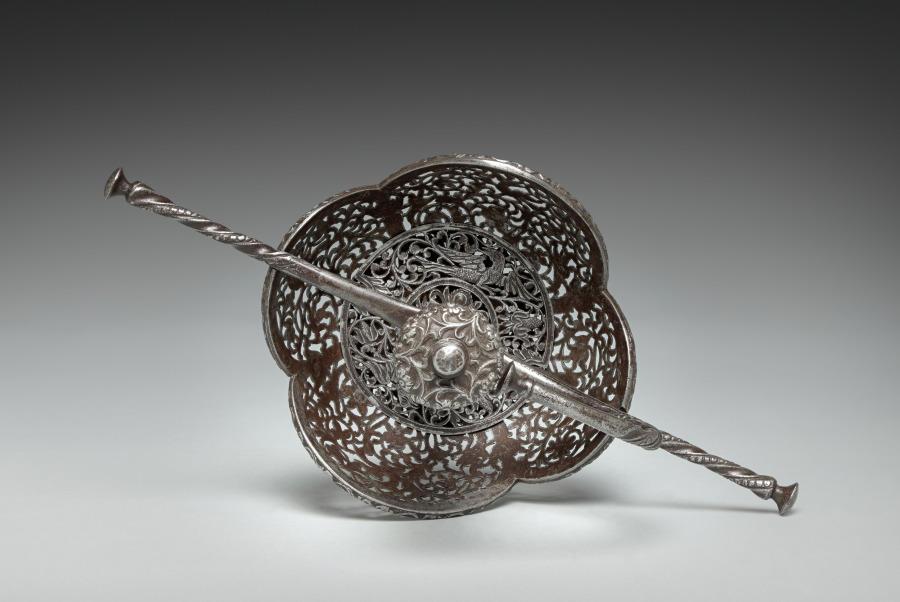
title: Cup-Hilted Rapier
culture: Spain, Toledo, 17th century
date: c. 1650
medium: Pierced and chiseled steel;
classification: Arms and Armor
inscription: PEDRO DEL MONTE/ IN TOLEDO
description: For parrying, rapiers were often made with accompanying daggers as a matched set. The aristocracy's taste for rich and intricate styles of decoration led to extravagant gilding, chiseling, piercing, enameling, and silvering. The more costly or unusual these weapons appeared, the more they were desired by the clientele who commissioned them, not only for dueling but also as the ultimate accessory.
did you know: The guard is richly decorated with chiseled and pierced arabesques, an ornamental design consisting of intertwined flowing lines.